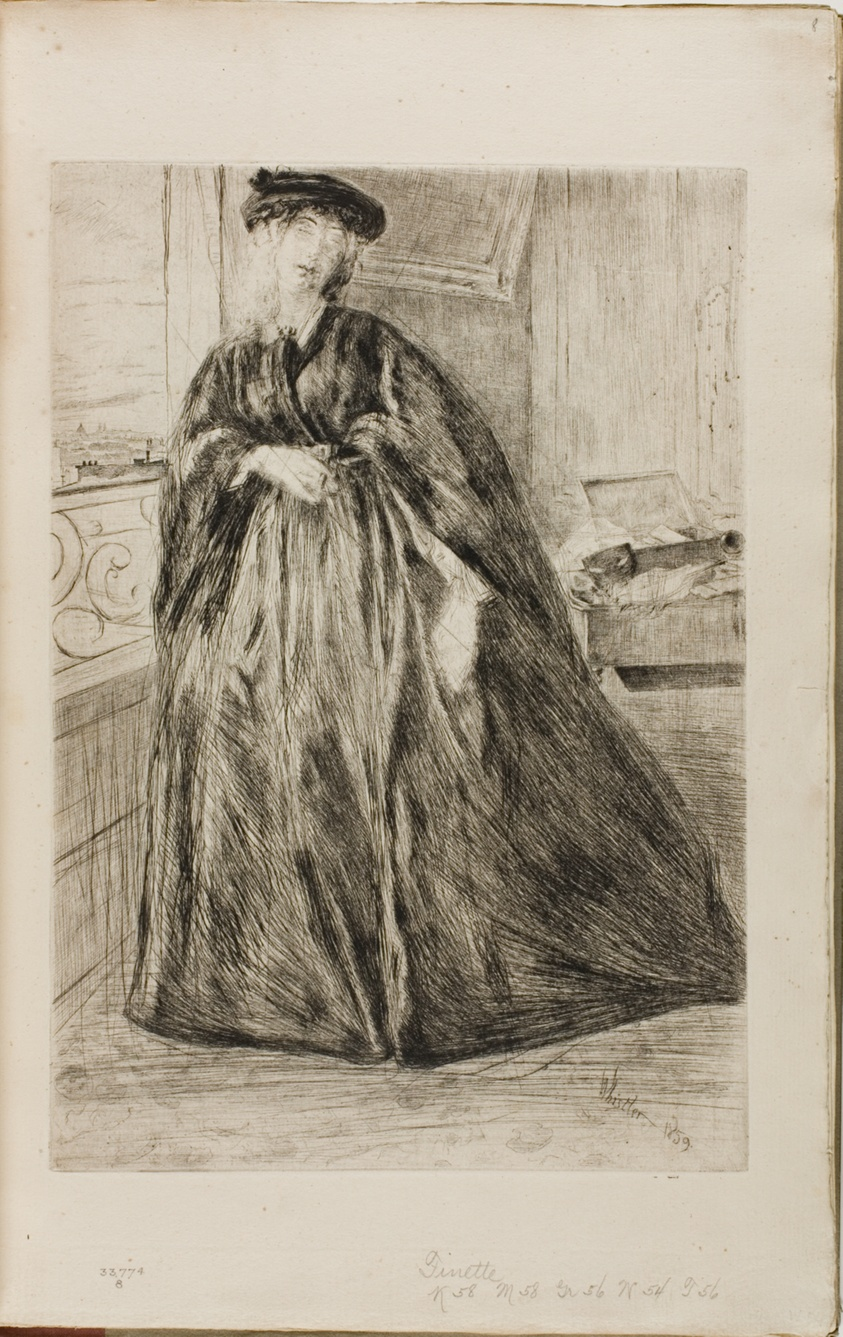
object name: Print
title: Finette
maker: James McNeill Whistler (American, 1834-1903)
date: 1859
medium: Etching and drypoint, with drypoint cancellation, in black ink on ivory laid paper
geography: United States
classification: etching; prints and drawing; book; drypoint; print; paper